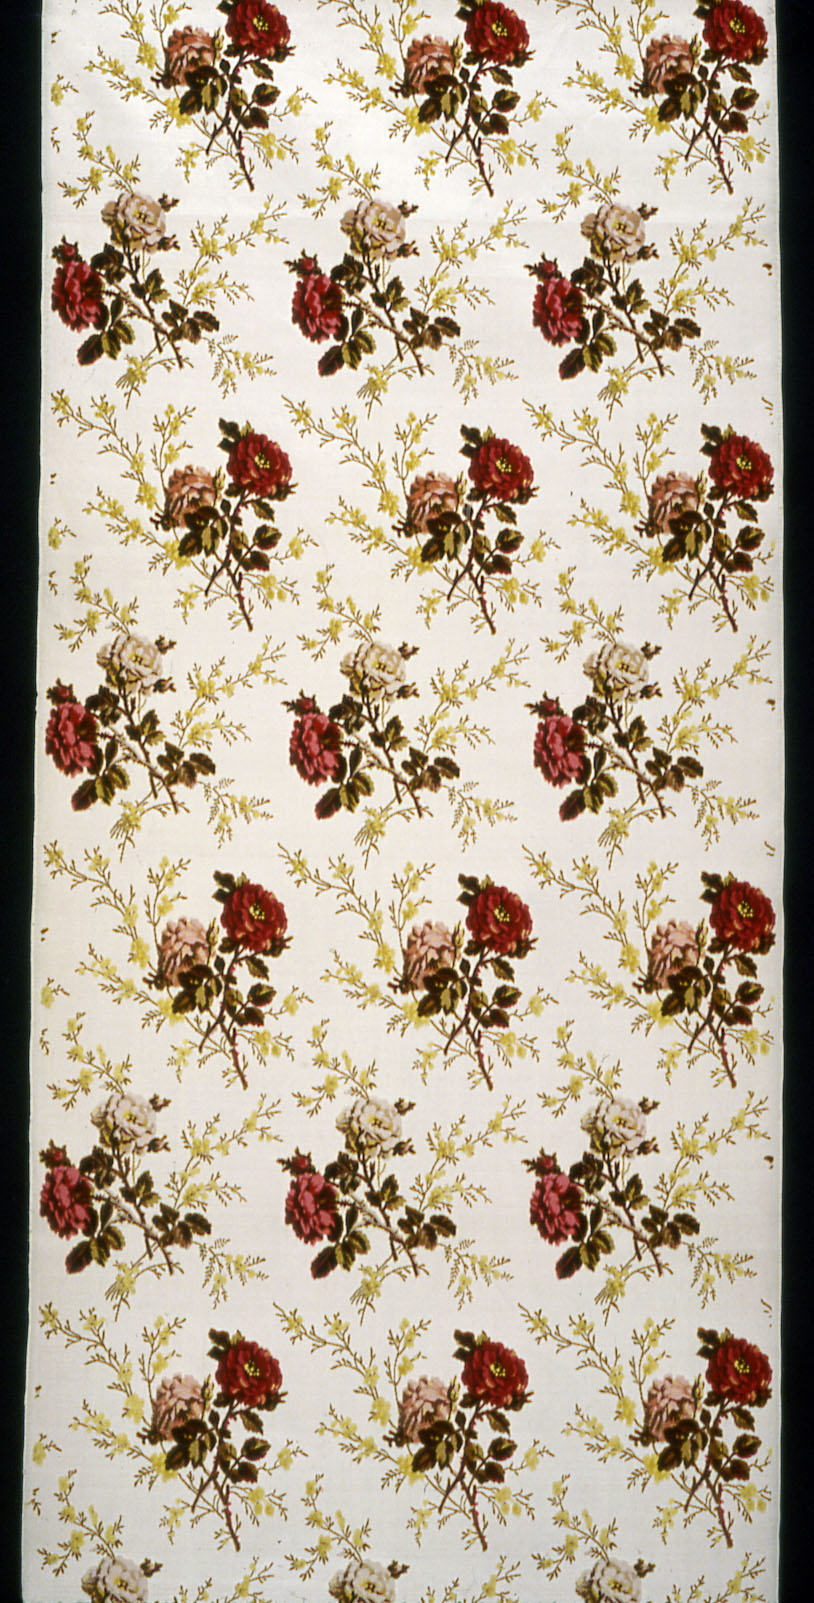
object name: Textile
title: Panel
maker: Produced by Mathevon et Bouvard, 1810–1895; France, Lyon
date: 1860/80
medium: Silk, satin weave, cut and uncut voided velvet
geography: Lyon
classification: textile; weaving - velvet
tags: roses, floral arrangements, foliage